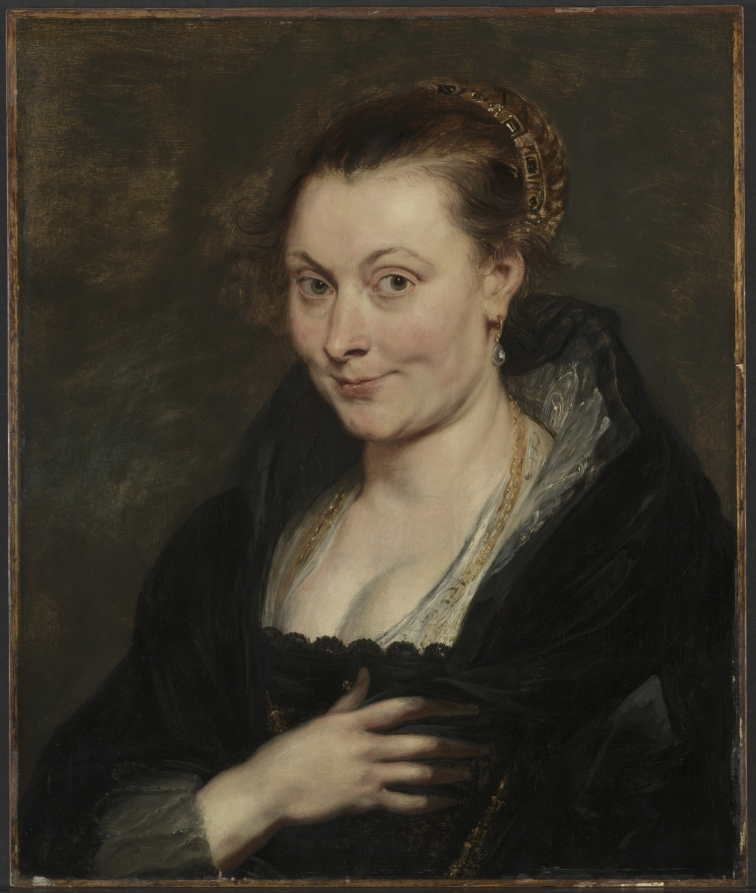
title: Portrait of Isabella Brant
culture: Flanders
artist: Peter Paul Rubens (Flemish, 1577–1640)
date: c. 1620–25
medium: oil on wood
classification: Painting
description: Isabella Brant was Rubens’s first wife. He painted her many times in many different ways before she died at the age of 35 (she is a model for a nymph in the other work by Rubens in this room). This intimate portrait, painted at least five years before her death, suggests the close relationship between the painter and sitter through the warm palette, the luscious brushstrokes, and her lively expression.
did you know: First, Rubens painted Isabella’s face, then at a later date he added hands.